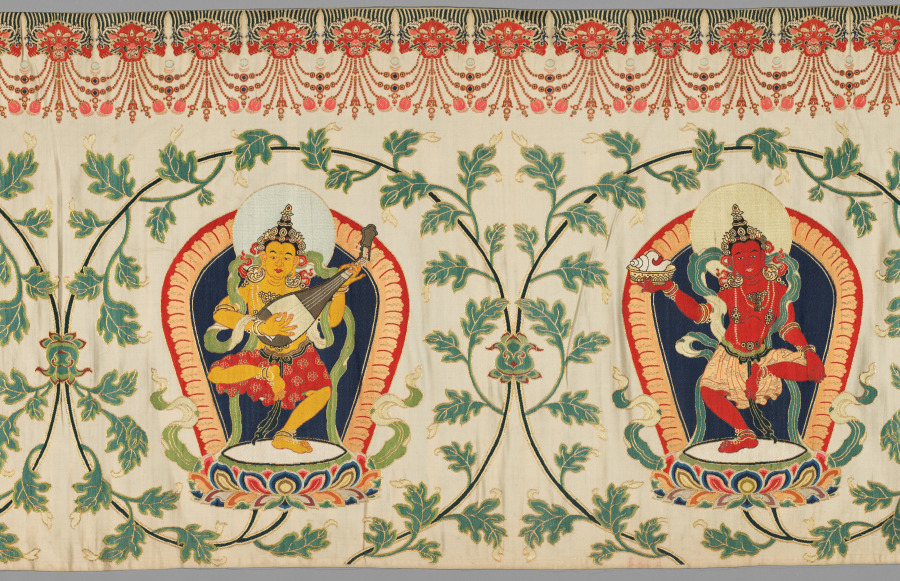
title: Brocaded Strip, known as "Imperial Tribute Brocade"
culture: China, Qing dynasty (1644-1911)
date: c. 1770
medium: brocaded satin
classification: Textile